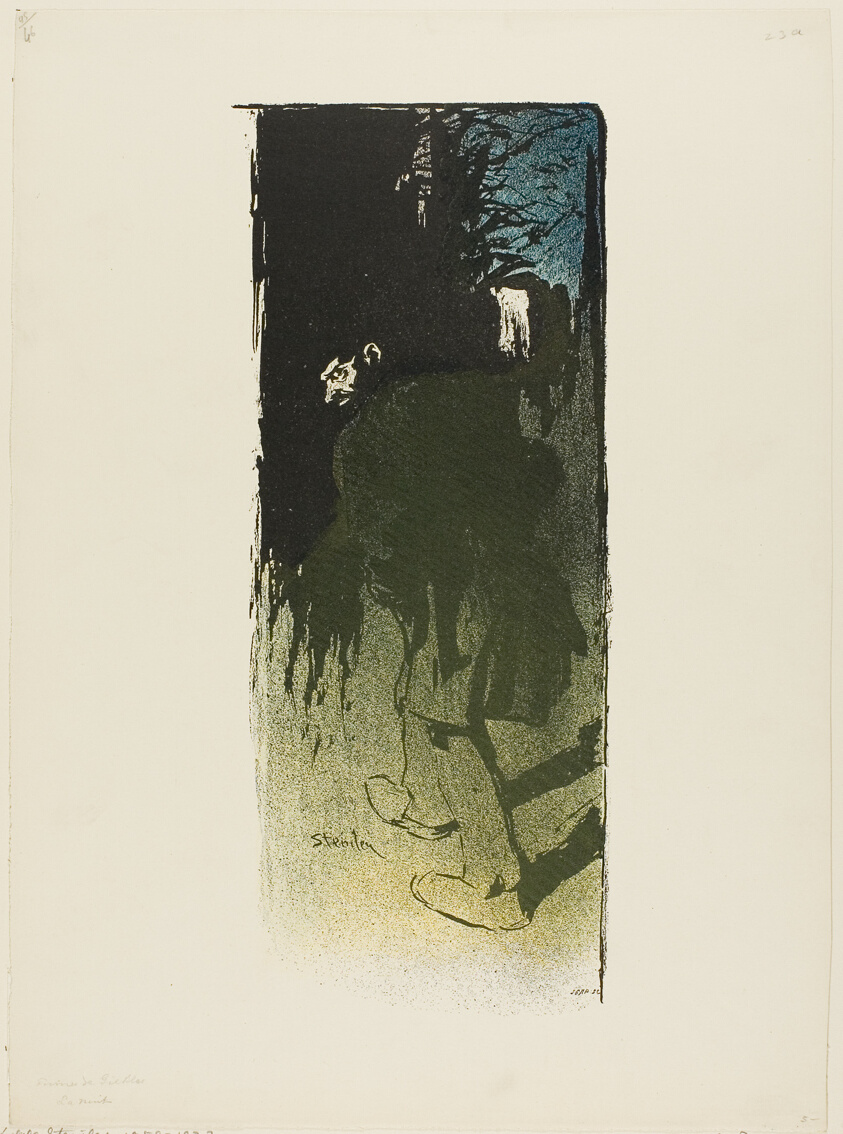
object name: Print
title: La Nuit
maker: Théophile-Alexandre Steinlen; French, born Switzerland, 1859-1923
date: published November 17, 1895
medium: Photorelief print in blue, yellow and black on ivory wove paper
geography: France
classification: photorelief; print; prints and drawing